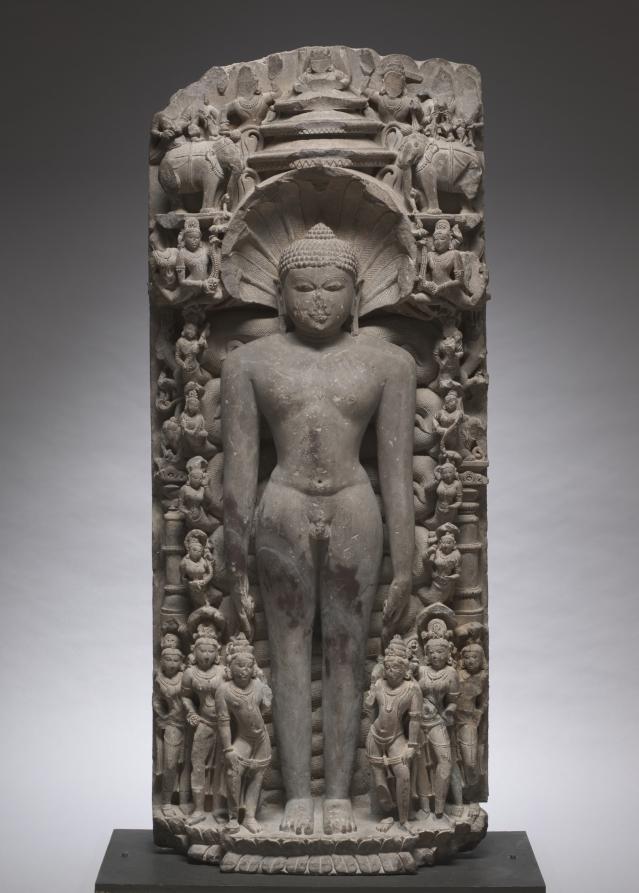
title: Parshva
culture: Central India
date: 800s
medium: sandstone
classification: Sculpture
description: Parshva is the 23rd of the 24 Jinas who achieved liberation. He is the only one who is depicted with a serpent. This sculpture was made for followers of the branch of Jainism called Digambara, who enforce the regulations of total nudity among those actively seeking liberation. The only adornment of his figure is the auspicious symbol on his chest and the wheels of righteousness on his palms. The stark form of thenude body standing in a posture of meditation is masterfully set off from the array of gods and serpent divinities who venerate him. He stands with his feet on a lotus pedestal, but his hierarchically tall form reaches to the heavens, where gods fly to honor him with flower garlands. Three umbrellas over his head indicate his status as a liberated being worthy of worship.